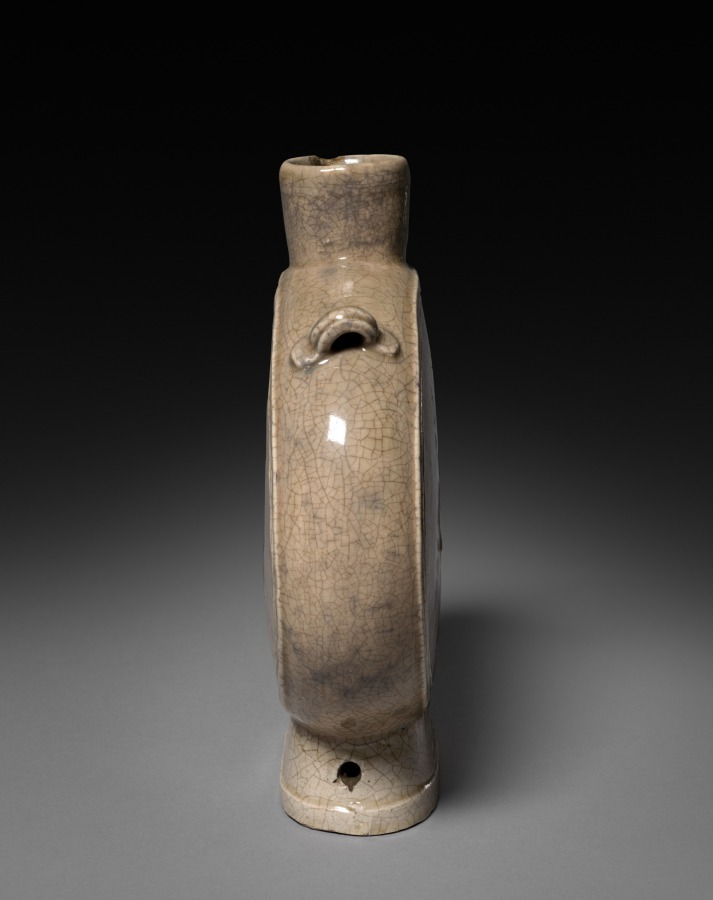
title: Pilgrim Bottle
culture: China, Ming dynasty (1368–1644)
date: 1368–1644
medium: porcelain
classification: Ceramic